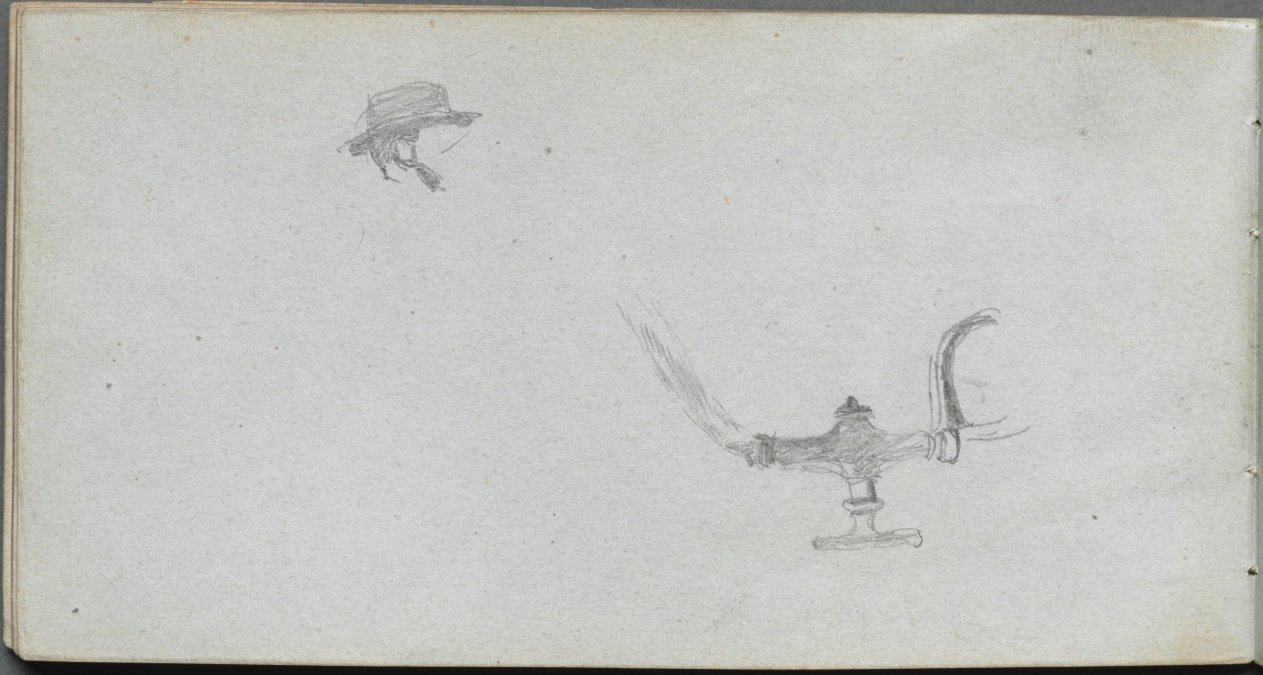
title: Sketchbook, page 26: Study of a Head and a Lamp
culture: France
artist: Ernest Meissonier (French, 1815–1891)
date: c. 1860s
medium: graphite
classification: Bound Volume